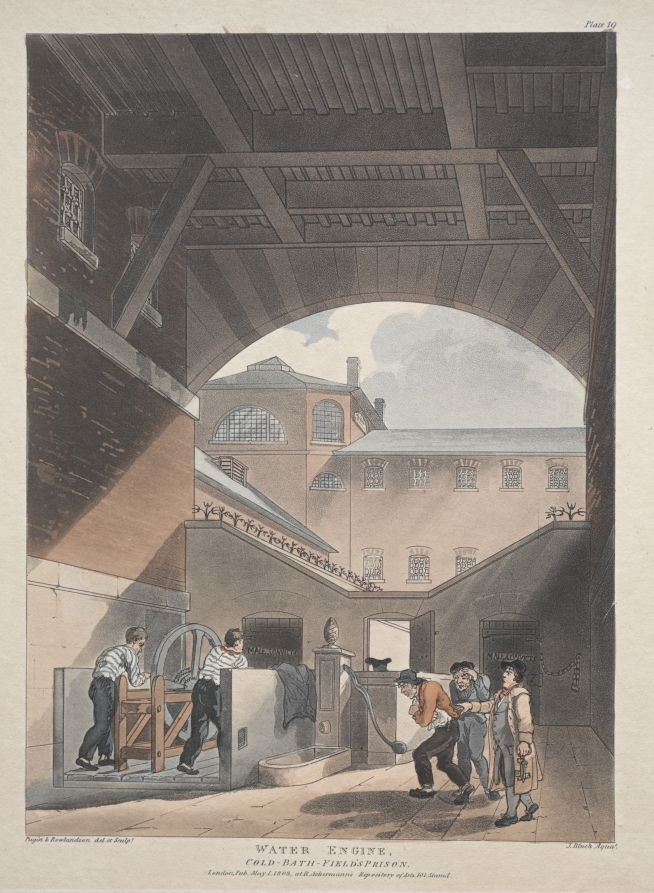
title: Water Engine, Cold Bath, Field's Prison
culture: England, 19th century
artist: Thomas Rowlandson (British, 1756–1827)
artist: and Augustus Charles Pugin (British, 1762–1832)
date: 1808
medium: etching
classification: Print